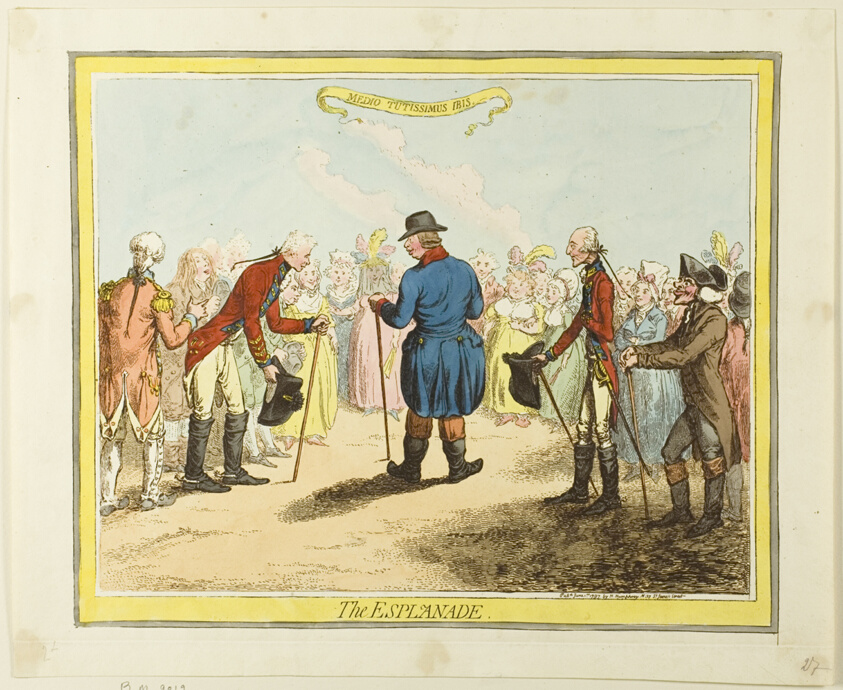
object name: Print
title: The Esplanade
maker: James Gillray (English, 1756-1815); published by Hannah Humphrey (English, c. 1745-1818)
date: published June 1, 1797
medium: Hand-colored etching on paper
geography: England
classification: etching; print; prints and drawing